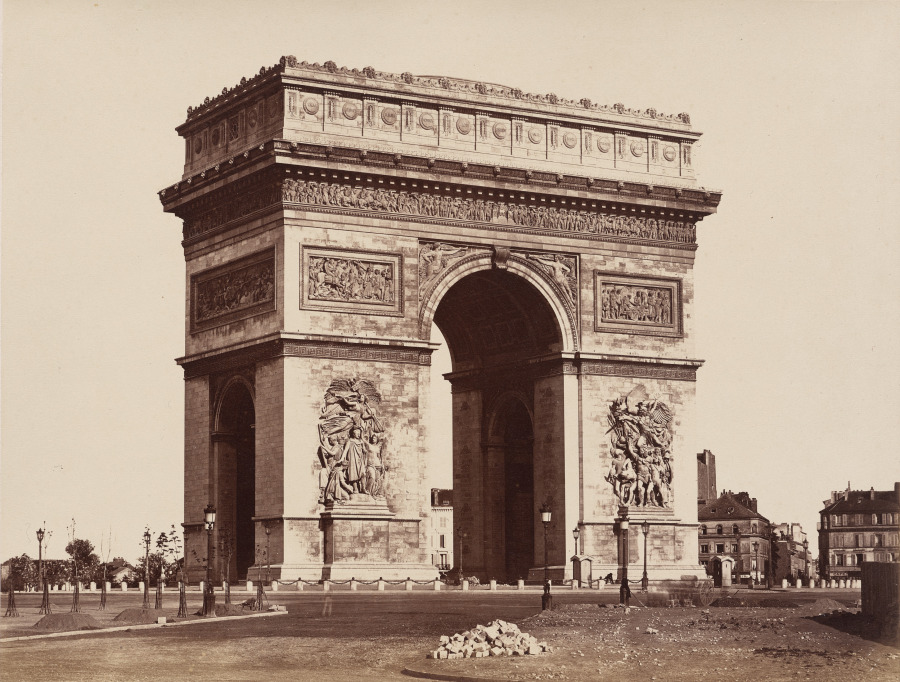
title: Arc de Triomphe de l'Etoile, Paris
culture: France, 19th century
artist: Édouard Baldus (French, 1813–1889)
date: c. 1860s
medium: albumen print from collodion negative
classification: Photograph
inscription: Imprinted in black on recto of mount: “40”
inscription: Written in black ink on recto of mount: “E. Baldus”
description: The construction materials seen here in the foreground symbolize the fact that for three decades starting in 1854, Paris was a construction site as Baron Haussmann replaced the crooked streets and crumbling buildings of medieval Paris with a modern city. Its rational city plan featured broad avenues that radiated from key sites like the Arc de Triomphe.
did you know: Completed in 1836, the Arc is dedicated to the armies of the French Revolution and the Second Empire and has gained additional symbolic force with each war fought by the French.